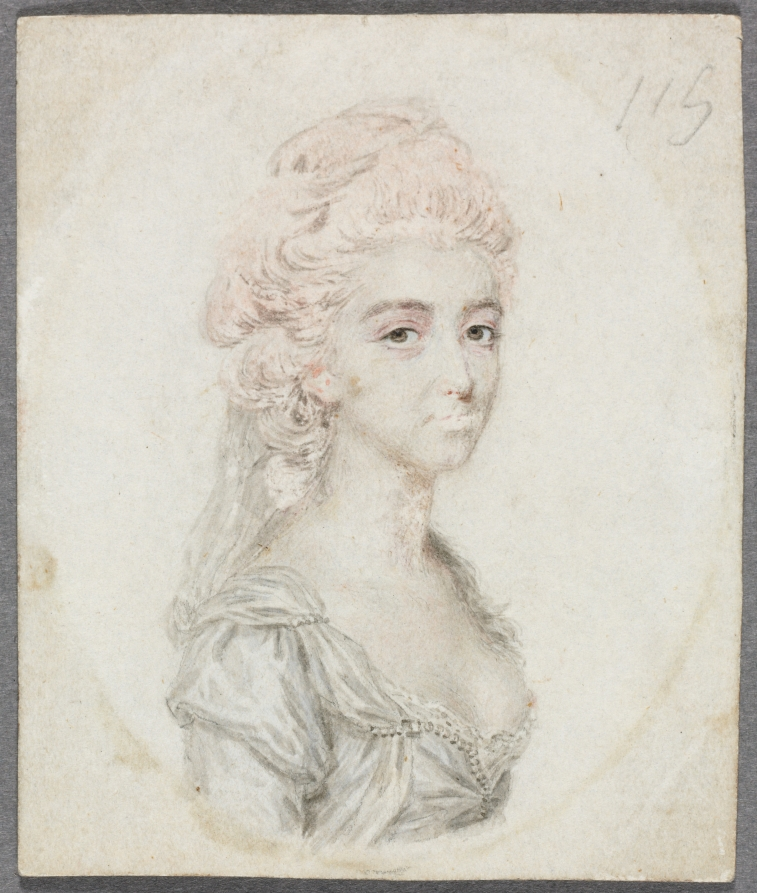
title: Portrait of a Woman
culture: England, 18th century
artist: John I Smart (British, 1741–1811)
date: c. 1776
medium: graphite and wash on laid paper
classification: Portrait Miniature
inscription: inscribed on front of paper at upper right corner: 119 (or 115?); inscribed on paper backing, in graphite, upside down at lower left: 10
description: Although it is impossible to say if it was always part of the artist’s process to execute a preparatory sketch prior to painting each miniature, we do know that John Smart retained many hundreds of these sketches. A group of preparatory sketches—of which this portrait is one—descended through the Smirke family after Smart’s daughter Sarah gave a sketchbook containing preparatory portrait studies to her friend Mary Smirke, sister of the celebrated Victorian architect Sydney Smirke. This book was probably broken up around 1877 when it was divided between Sydney’s daughters Mary Jemmett and Mrs. Lange, whose portions were both sold at auction in 1928. Compared to his contemporaries George Engleheart (1752–1829) and Andrew Plimer (1763–1837), whose female sitters were often painted in similar simple white gowns, Smart often lavished more attention on the costumes in his portraits of women, whose dresses incorporated colored silks, printed fabrics, and luxury trimmings like lace and fur. The sitter’s head and shoulders face left. She has what was probably once blond hair—now faded to pink—dressed high on her head, with curls down the back of her neck, over which a veil descends. Her eyes are hazel, and the color of her lips has almost completely faded. Positioned in an oval, and revealing much of her left breast, she wears a low-necked dress with faint traces of pink pigment, trimmed with a string of pearls. The background is unpainted. To this date, the finished ivory for which this preparatory sketch was presumably undertaken has not been discovered. The portrait was assigned the historically colorful but fictitious title of “Henrietta Maria” at some point after memory of its true identity had been lost. Giving illustrious titles to portraits of unknown sitters was a popular strategy adopted by dealers during the nineteenth and twentieth centuries, often applied to miniature portraits and, in particular, to Smart’s sketches of women. In 1948 Arthur Jaffé wrote to the Cleveland Museum of Art that a “Mrs. Samuelson of Exeter recently brought me two frames, with six sketches mounted in each, of ladies, mostly with fancy names. I think there is no doubt that they were part of Mrs. Lange’s share of the Smirke sketches, though unlike yours they did not pass through Christie’s auction in Dec. 1928. I persuaded Mrs. Samuelson to let me remove them from their frames and to rub the paper backing from the card on which the sketches are painted. The result was as follows. Included was a No. 115 called, Margaret, Archduchess of Austria, which is the same number given to our Henrietta Maria.” Elsewhere Jaffé notes that the number on the front of this sketch was probably a 119 instead of a 115.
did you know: Sketches helped John Smart work out the particulars of a portrait before commencing the miniature on ivory; they were useful in the event that a duplicate might later be required.